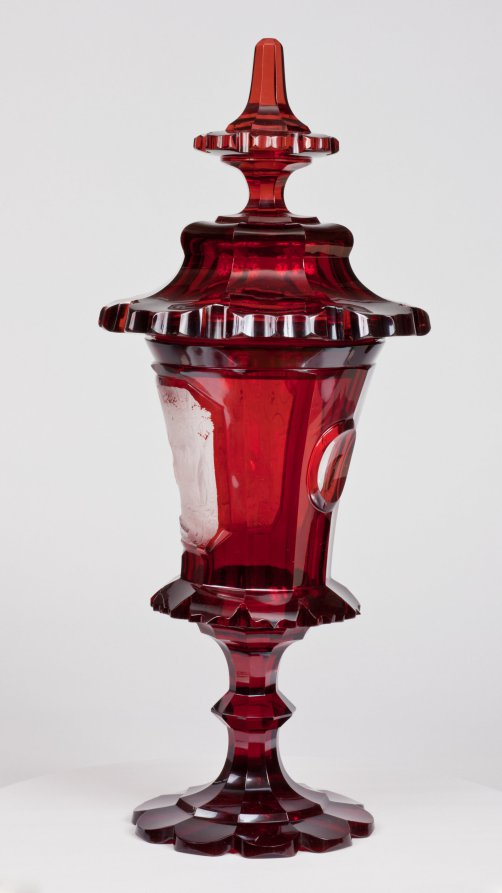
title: Covered Cup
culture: Bohemia, 19th century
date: mid-1800s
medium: ruby glass with engraved decoration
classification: Glass